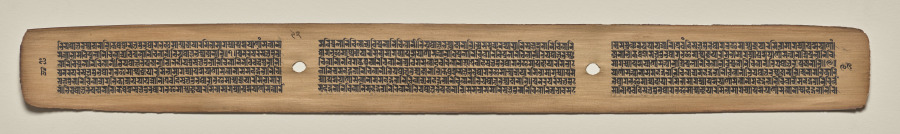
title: Text, Folio 92 (verso), from a Manuscript of the Perfection of Wisdom in Eight Thousand Lines (Ashtasahasrika Prajnaparamita-sutra)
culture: Eastern India, Bihar, Vikramashila Monastery. Painting: Nepal, Kathmandu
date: Sunday, September 14, 1119 (year 239 of the Newar Samvat in the month of Ashvina)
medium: gum tempera and ink on palm leaves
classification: Painting